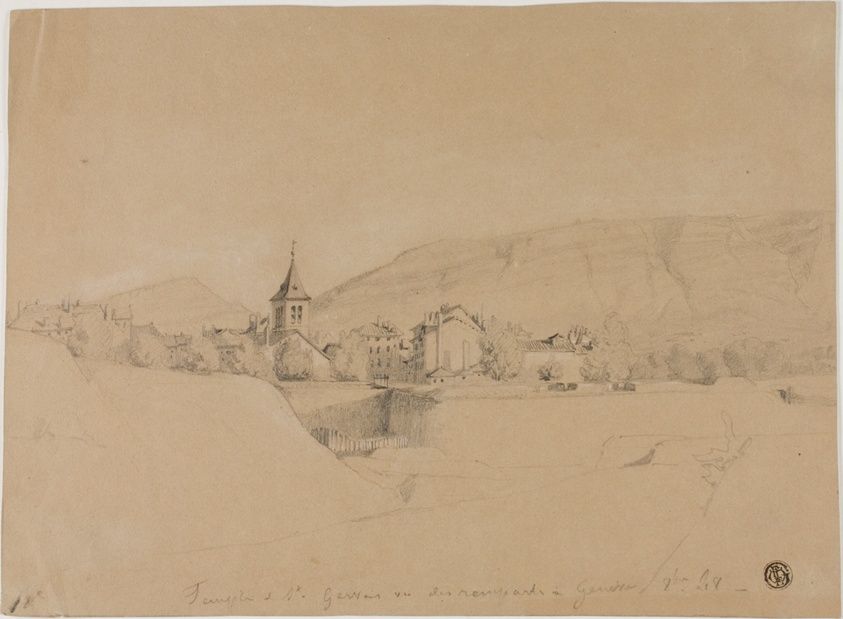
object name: Drawing and Watercolor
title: The Church of Saint-Gervais Seen From the Ramparts at Geneva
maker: Unknown Artist; European, 1600-1800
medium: Graphite, heightened with white chalk, on tan wove paper, tipped on ivory wove paper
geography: Europe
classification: graphite; drawings (visual works); prints and drawing